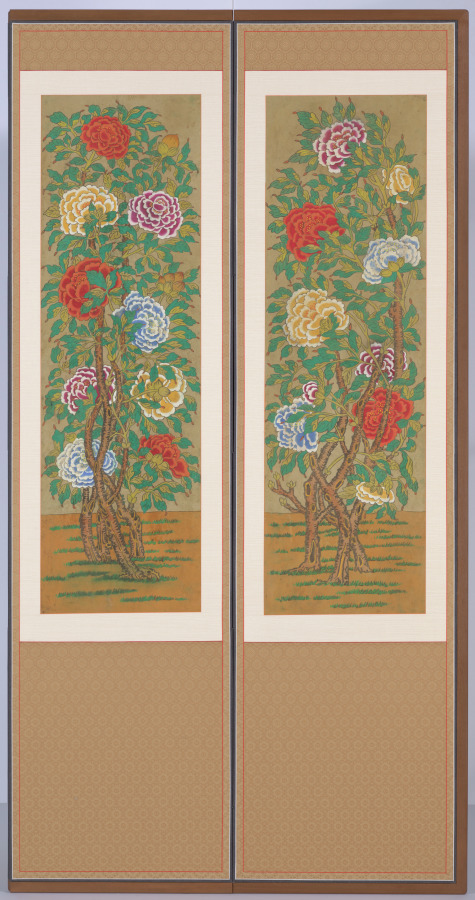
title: Peonies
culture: Korea, Joseon dynasty (1392−1910) or Japanese colonial period (1910−1945)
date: early 1900s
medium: Eight-panel folding screen; ink and color on silk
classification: Painting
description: By the late nineteenth century, peony paintings with bold designs and striking graphic stylization were increasingly produced and consumed by middle-class members because of its symbolic meaning: prosperity and wealth. This early 20th-century folding screen of peonies may have used for festive occasions such as weddings.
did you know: This early 20th-century folding screen has both sides painted with the image of bloomed peonies.